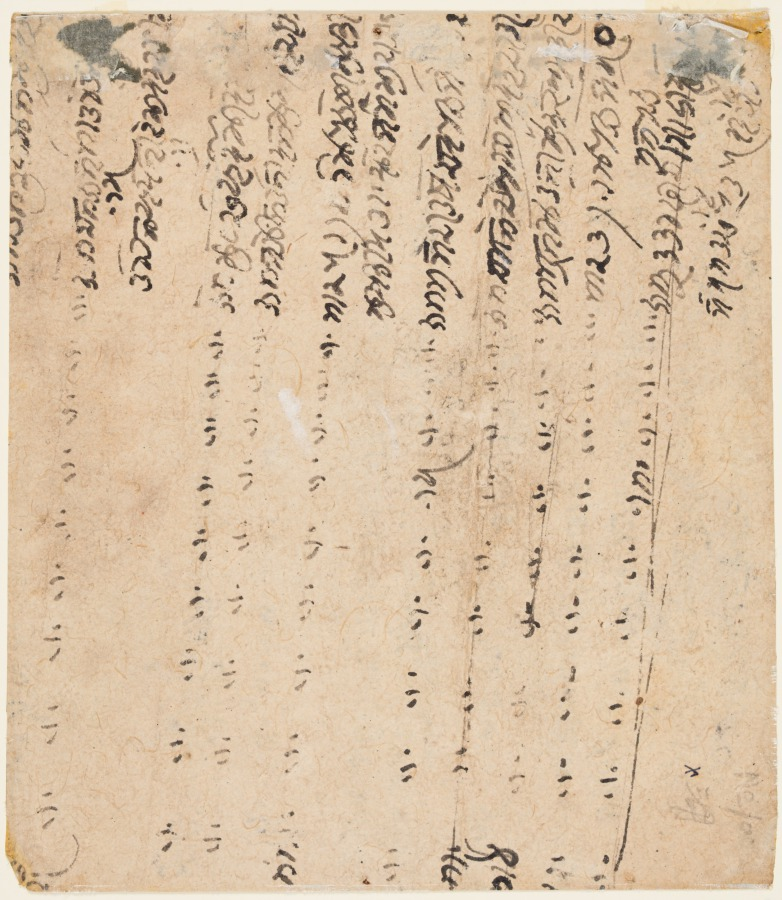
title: Women worshiping a Shiva linga: Devagandhari Ragini of Hindol Raga, from a Ragamala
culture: Northern India, Pahari kingdoms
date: c. 1700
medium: gum tempera and gold on paper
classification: Painting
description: Removed from any temple setting, the focus of the scene is on the intensity of the women’s devotions to the Hindu god Shiva in his abstract form of a linga. The figure on the right tosses flower petals on the linga and offers incense in a handheld censer. Her taller companion wearing a yellow blouse holds two lotus flowers in her hands cupped in devotion as she bows reverently.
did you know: The iconography of Devagandhari is consistent in several Ragamala series from Chamba